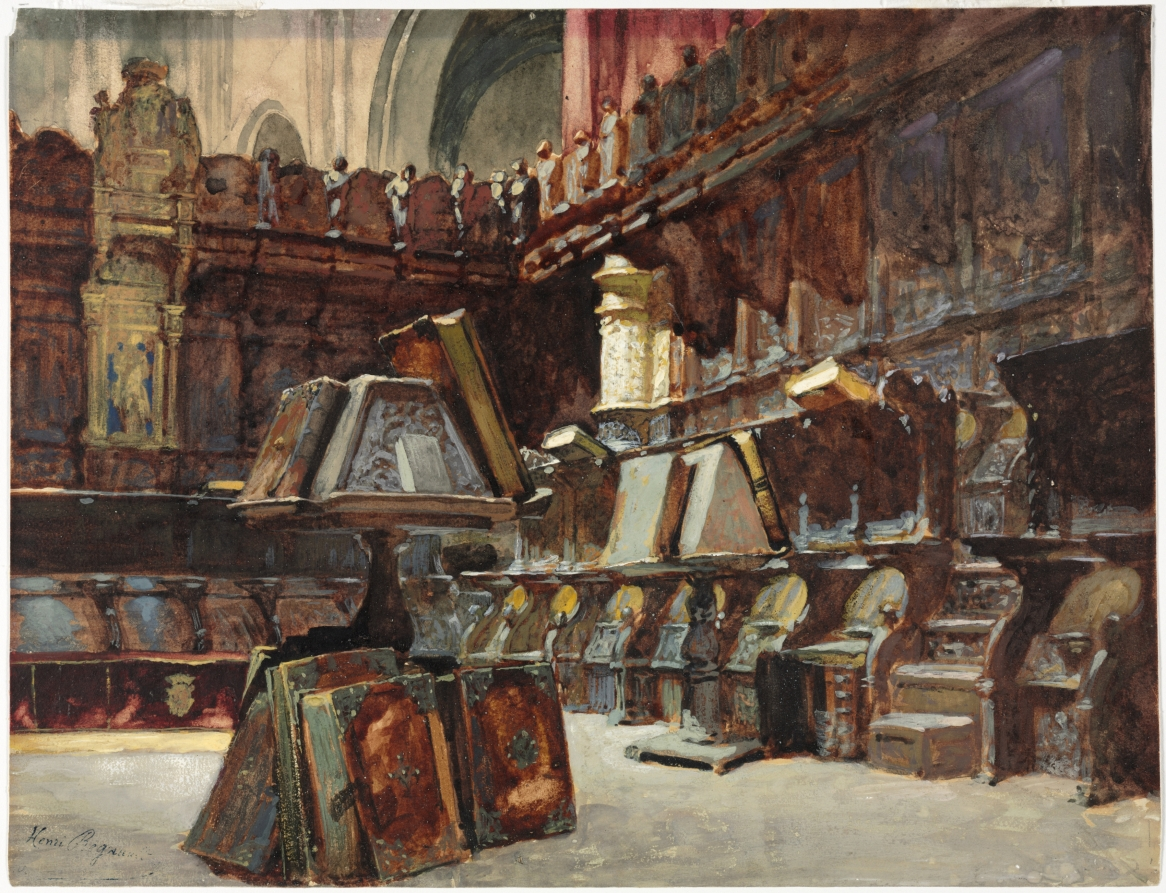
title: Choir Stalls in a Spanish Cathedral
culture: France, 19th century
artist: Henri Regnault (French, 1843–1871)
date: c. 1868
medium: watercolor and gouache with traces of graphite on cream wove paper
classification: Drawing